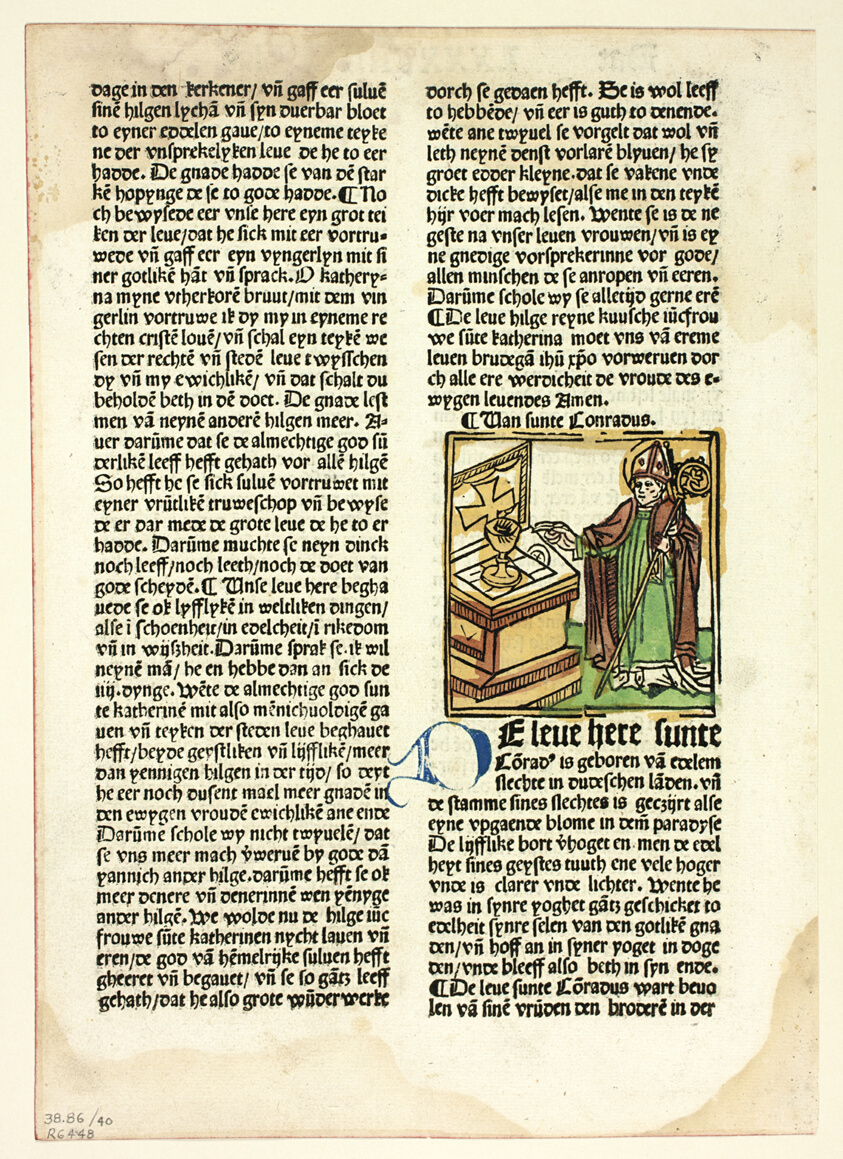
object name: Print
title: Saint Conrad from Der Heiligen Leben, Winterteil (Lives of the Saints, Wintertime), Plate 40 from Woodcuts from Books of the 15th Century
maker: Unknown Artist (Magdeburg, late 15th century); printed and published by Simon Koch, called Mentzer (German, active 1486–1503); original text by Jacobus de Voragine (Italian, c. 1230–1298); portfolio text by Wilhelm Ludwig Schreiber (German, 1855–1932)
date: 1487, portfolio assembled 1929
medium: Woodcut in black with hand-colored additions, and letterpress in black with pen and blue ink additions (recto), and letterpress in black (verso), on cream laid paper, tipped onto cream wove paper mat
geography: Germany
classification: woodcut; print; prints and drawing